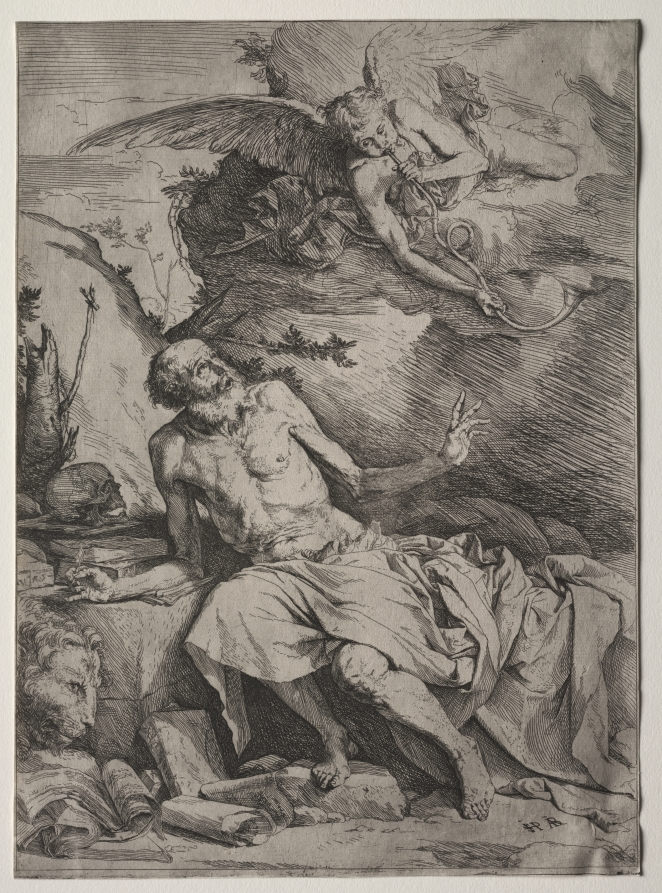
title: Saint Jerome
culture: Spain, worked in Naples, 17th century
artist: Jusepe de Ribera (Spanish, 1591–1652)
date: 1621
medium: etching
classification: Print